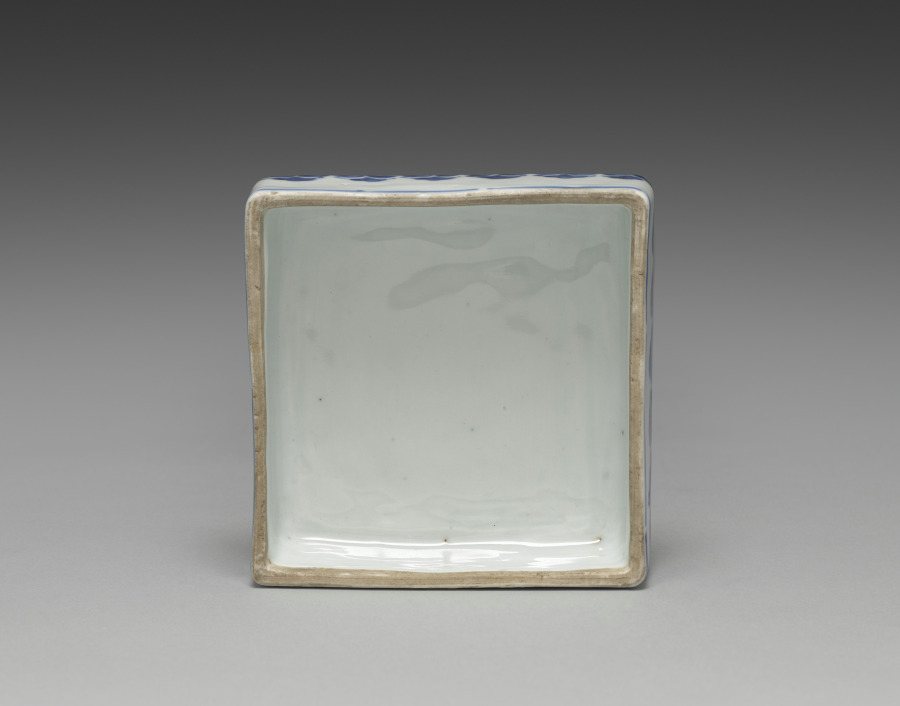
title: Lid for a Box with Butterfly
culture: Japan, Meiji period (1868–1912)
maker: Seifū Yohei I (Japanese, 1801–1861)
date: 1855–57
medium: Porcelain with underglaze blue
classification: Ceramic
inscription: 清風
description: This sturdy box, with comparatively thick walls and resulting heft, is sparsely decorated with a single butterfly motif in dark underglaze blue cobalt in one corner of the lid and with repeating floral patterns along the lid and base. Single broken lines of underglaze blue define the edge of the box lid’s top where it curves to meet the sides and again where it meets the base of the box. Another blue band runs around the upper rim of the base where it meets the lip, left unglazed for a better grip of the lid when the box is closed. Yohei I’s signature on the center of the recessed base is set within a wide blue square. The porcelain box is meant to call to mind a famous story attributed to Zhuang Zhou (c. 369–286 BCE), also known as Master Zhuang, or Zhuangzi, pronounced Soji in Japanese. The second chapter of Zhuangzi, his eponymous collection of anecdotes, records the story as follows: Once, Zhuang Zhou dreamt he was a butterfly flitting and fluttering about, happy with himself and doing as he pleased. He didn’t know that he was Zhuang Zhou. Suddenly, he woke up and there he was, solid and unmistakably Zhuang Zhou. But he didn’t know if he was Zhuang Zhou who had dreamt he was a butterfly, or a butterfly dreaming that he was Zhuang Zhou. Between Zhuang Zhou and the butterfly there must be some distinction! This is called the Transformation of Things. The lidded box resembles kosometsuke, the porcelains in underglaze blue made to order or on speculation for the Japanese market during the early to mid-1600s in Jingdezhen, China. These works were often made from designs submitted by Japanese clients, many of whom were masters of chanoyu, who sought the wares for their tea practice. The relative roughness of the clay and the distortions in the fired object were intentional, as they created the rustic effect desired by Japanese tea communities.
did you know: The bottom of the box is inscribed with the name Seifū.